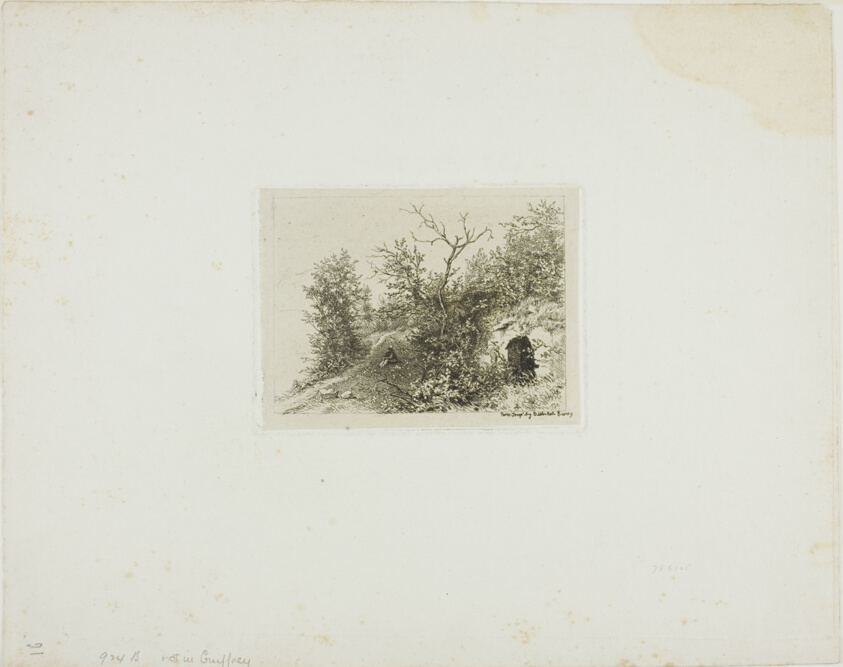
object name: Print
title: Man Sitting on a Hill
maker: Charles Émile Jacque (French, 1813-1894)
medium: Etching on cream China paper laid down on ivory wove paper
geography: France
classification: etching; print; prints and drawing